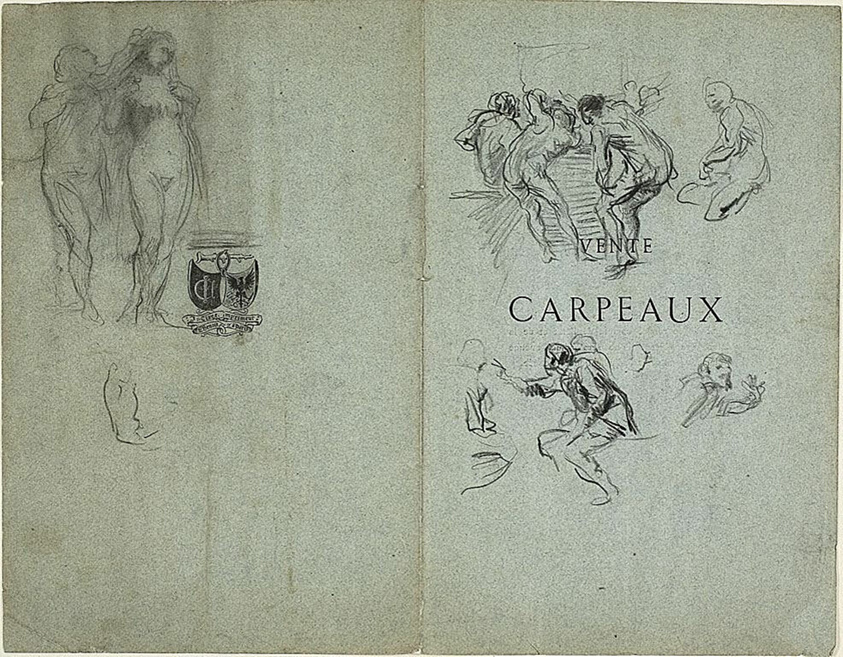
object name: Drawing and Watercolor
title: Sketch of Nude Woman Having Her Hair Groomed and Groups of Figures (recto); Sketches of Riding Figure and Nude Figures (verso)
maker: Jean Baptiste Carpeaux (French, 1827-1875)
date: 1847/75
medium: Black crayon (recto and verso) on blue wove paper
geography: France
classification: crayon; drawings (visual works); prints and drawing